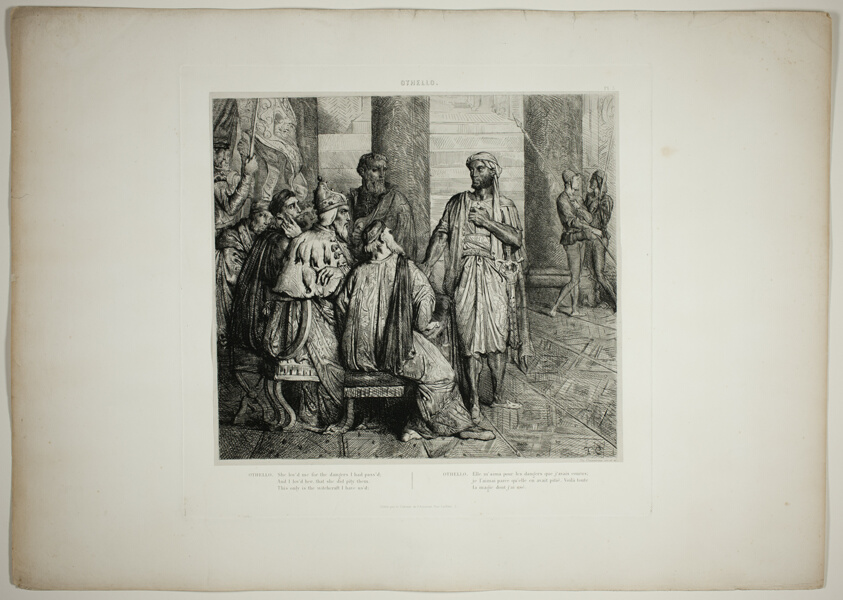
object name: Print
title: She Lov'd Me for the Dangers, plate three from Othello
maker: Théodore Chassériau (French, 1819-1856)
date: 1844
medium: Etching, engraving, and roulette on paper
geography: France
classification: etching; print; prints and drawing